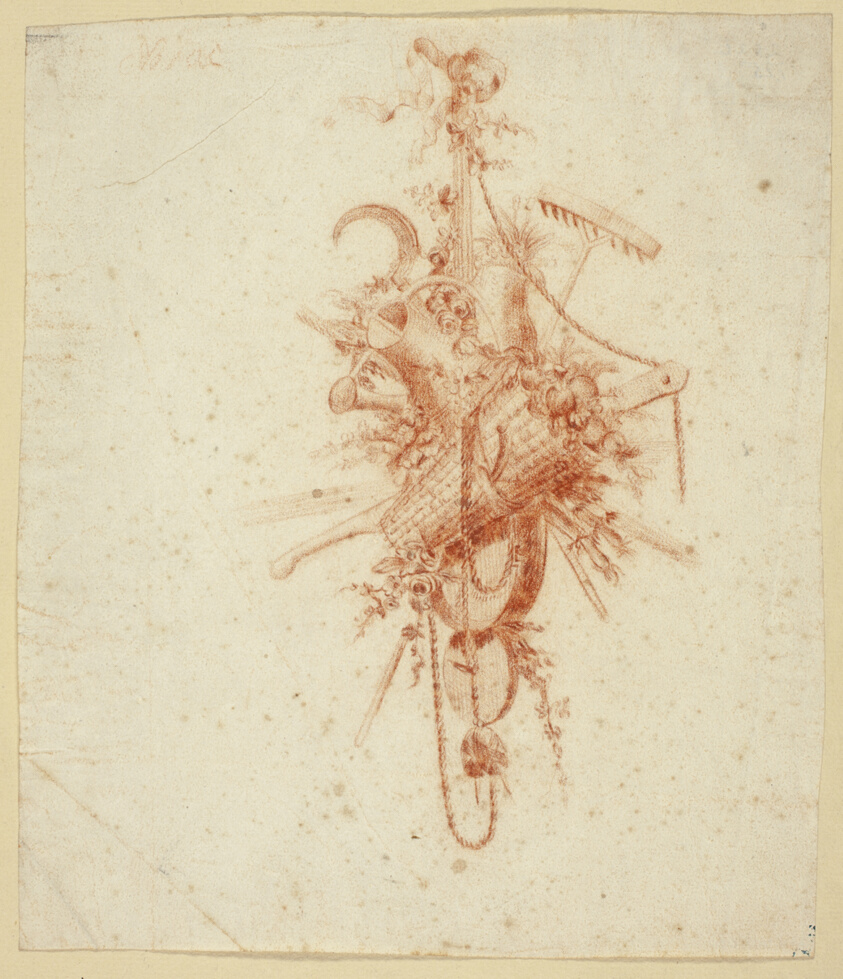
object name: Drawing and Watercolor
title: Design for Trophy with Gardening Tools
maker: Attributed to Jean Baptiste Huet (French, 1745-1811); or Jean Baptiste Pillement (French, 1719/28-1808)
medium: Red chalk on ivory laid paper, tipped onto tan laid paper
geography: France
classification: drawings (visual works); prints and drawing